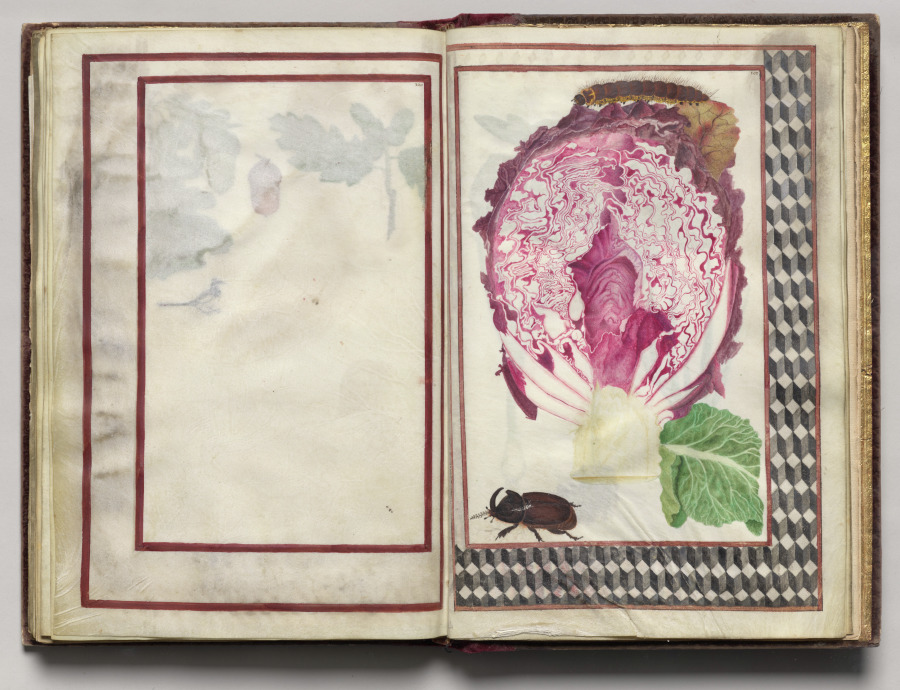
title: Cross Section of a Red Cabbage with a Beetle and Caterpillar with Geometric Border, folio 45 (recto), from Florilegium (A Book of Flower Studies)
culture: France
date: 1608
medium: watercolor, ink, silver, and gold over occasional traces of pencil, on vellum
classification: Bound Volume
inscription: Dated: Poitiers 1608 (on frontispiece) Signed: On frontispiece in black ink, lower right: Van Kuyk Notation on drawing: Frontispiece: in pencil, lower margin: * élève de Van Kessel, peintre flammand (* in pencil also appears in front of Van Kuyk's name).